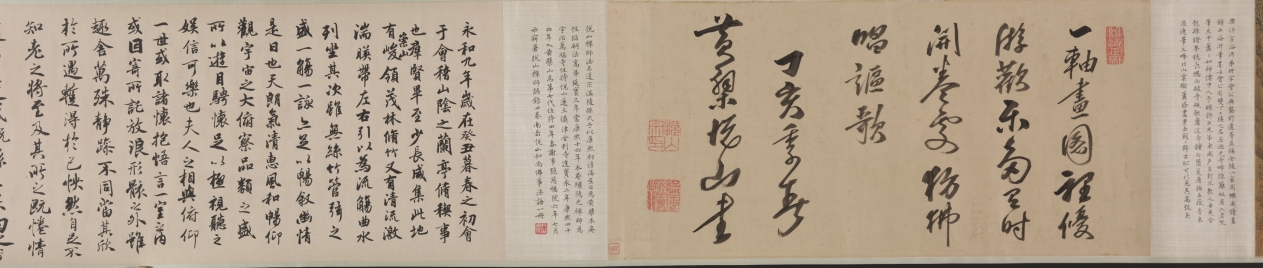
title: Purification at the Orchid Pavilion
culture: China, Qing dynasty (1644-1911)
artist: Fan Yi (Chinese, c. 1615–before 1688)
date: 1671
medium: Handscroll; ink and color on silk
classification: Painting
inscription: Artist's inscription, signature, and 2 seals: Painted by Fan Yi of Zhongfu during the second month of winter of the xinhai year [1671]. [2 seals] Fan Yi zhi yin, Zi yu yi.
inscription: Title on the frontispiece by Monk Yueshan (1629-1709).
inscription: 3 colophons and 13 additional seals: 1 colophon, dated 1707, and 6 seals of Yueshan; 2 colophons and 3 seals of Wong Kwan-Shut (Huang Junshi) 黃君實 (b. 1934); 2 seals of Fu Shen 傅 申 (b. 1937); 2 seals of Tessai Tomioka 富岡鐵齋 (1836-1924).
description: By the 1600s, the historic gathering at Lanting, Zhejiang province, in 353 CE was a common theme in Chinese painting. Originally based on a composition attributed to Li Gonglin (1049– 1106), now lost, Wu school artists revived the theme. Fan Yi, the brother of the artist Fan Qi from Nanjing, used delicate brushwork and luminous colors to depict the spring gathering.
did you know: The gathering’s host is in the Orchid Pavilion at the end of the scroll, representing an episode known as “Wang Xizhi Watching the Geese 王羲之觀鵝圖.”